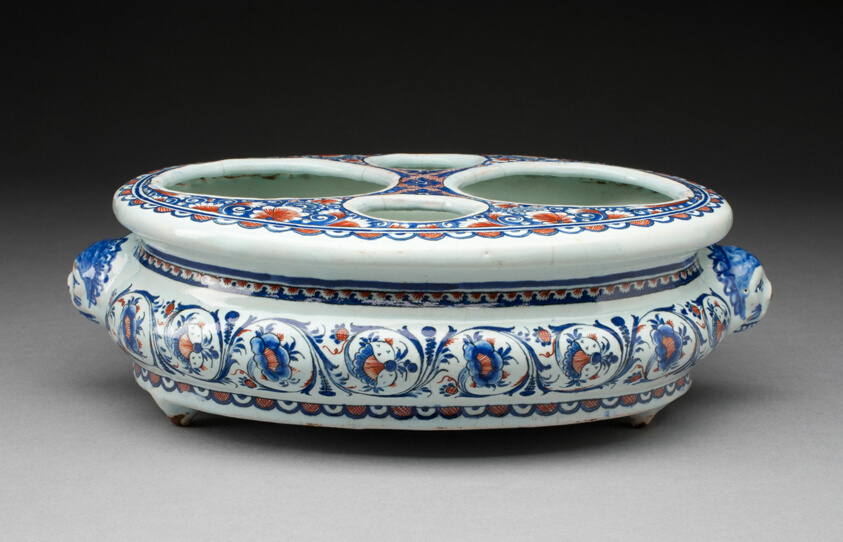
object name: Ceramics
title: Cruet Stand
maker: Rouen, France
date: c. 1725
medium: Tin-glazed earthenware (faience)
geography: Rouen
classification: tin-glazed ware; earthenware; european decorative arts; ceramics